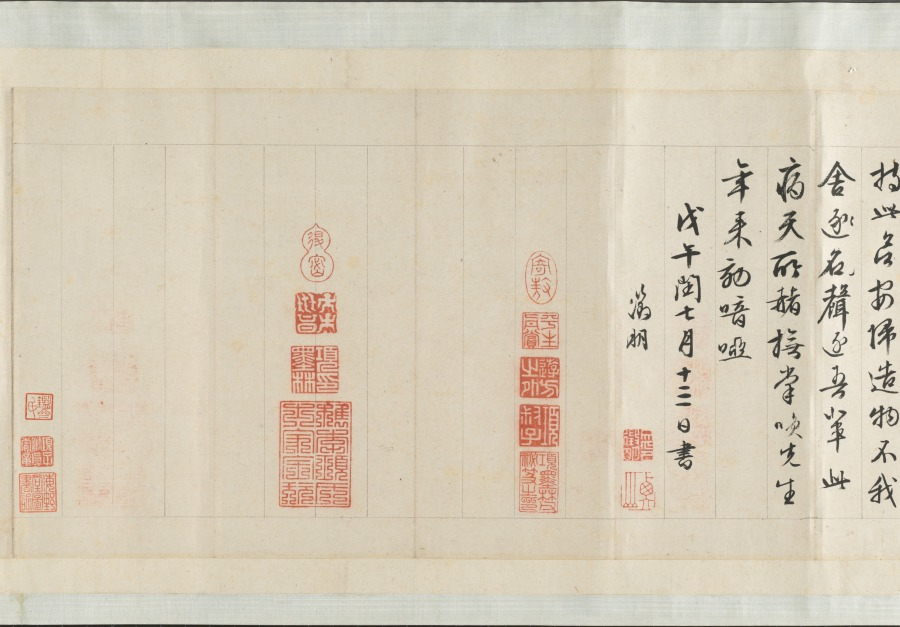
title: Garden for Solitary Enjoyment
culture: China, Ming dynasty (1368–1644)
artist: Qiu Ying (Chinese, 1494–1552)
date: 1515–52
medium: Handscroll; ink and light color on silk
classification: Painting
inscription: Accompanying text of an essay together with seven poems of Sima Guang (1019–1086) and one poem of Su Shi (1037–1101) written by Wen Zhengming (1470–1559) in 1558.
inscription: 2 colophons and 82 seals: 4 seals of Wen Zhengming 文徵明 (1470–1559); 59 seals of Xiang Yuanbian 項元汴 (1525–1590); 1 colophon, dated 1644, and 7 seals of Xiang Yukui 項禹揆 (c. late 1500s–1659); 1 colophon, dated 1880, and 2 seals of Weng Tonghe 翁同龢 (1830–1904); 2 seals of Ch'eng Chen-i (19th c.); 1 seal of Han Ch'ung (19th c.); 4 seals of Wan-go H. C. Weng 翁萬戈 (1918–2020); 3 seals unidentified.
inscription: Colophon by Xiang Yukui 項禹揆 (c. late 1500s–1659): The painting of The Garden for Self-enjoyment on the right by Shih-chou, Mr. Qiu [Qiu Ying] is in the style of Li Lung-mien. Its mood is peaceful, as if meeting the ancient gentlemen face to face among the brushes and silk; it lifts one above the sordid bustle of life. Formerly, my late father handed me this scroll which had only the painting without the written essay. I considered asking a good calligrapher to write the essay to add to it but was afraid that the quality of the writing would not match the painting. Several years later, I saw at a friend's house this essay and poems (of Ssu-ma Kuang] written by Hengshan [Wen Zhengming], once owned by my grandfather; so I spared no expense to obtain it. I rejoiced at this and said: "The divine swords are finally united. How things are pre-destined!" Now my friend Chang Kung-chao's technique for mounting [painting and calligraphy] is excellent. Therefore by daring to take them out and join them together, I can preserve this beautiful story of singular reunion. Xiang Yukui recorded at Hai-yeh-t'ang [hall] two days before New Year's Eve in the jiasheng year of the Chongzhen era [1644]. trans. LYSL/HK/WKH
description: Garden of Solitary Enjoyment refers to a site built in 1073 by the statesman Sima Guang (1019–1086) after he had retired to Luoyang, Henan province. Every spring, visitors would flock to his garden. Each of its seven structures references a historic figure. Sima wrote: I channel streams [like Du Mu], to water flowers [like Bai Juyi], or trim bamboo [like Wang Huizhi]. . . . I know of no joy between heaven and earth that could take its place. Qiu Ying’s painting, created after an 11th-century version of the same theme, must have appealed to garden owners of the Ming dynasty, since it became the template for numerous Suzhou workshop copies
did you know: Sima Guang completed his monumental survey of Chinese history, Zizhi tongjian, in the garden depicted in this painting.